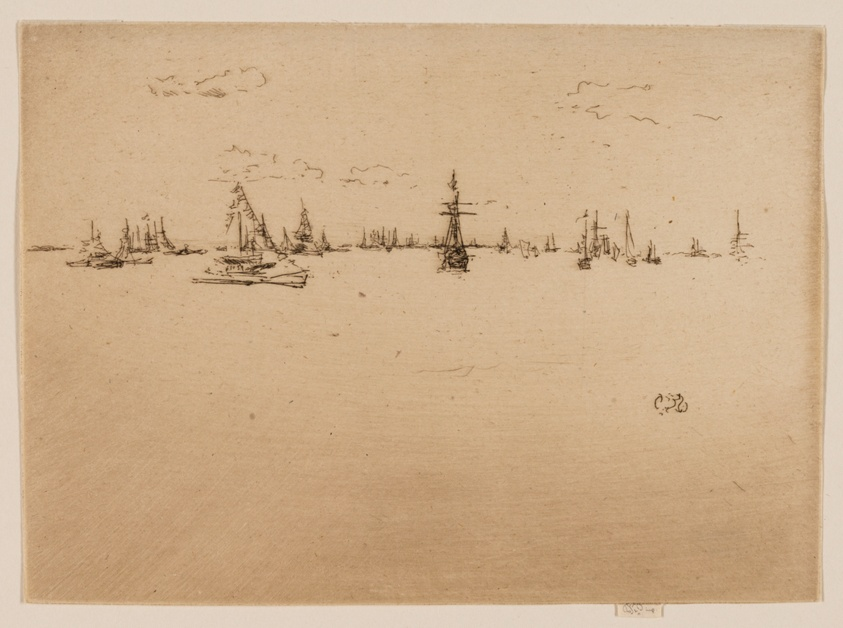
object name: Print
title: The Turret Ship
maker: James McNeill Whistler (American, 1834-1903)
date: 1887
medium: Etching and drypoint in black ink on cream laid paper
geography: United States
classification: etching; drypoint; print; prints and drawing; paper